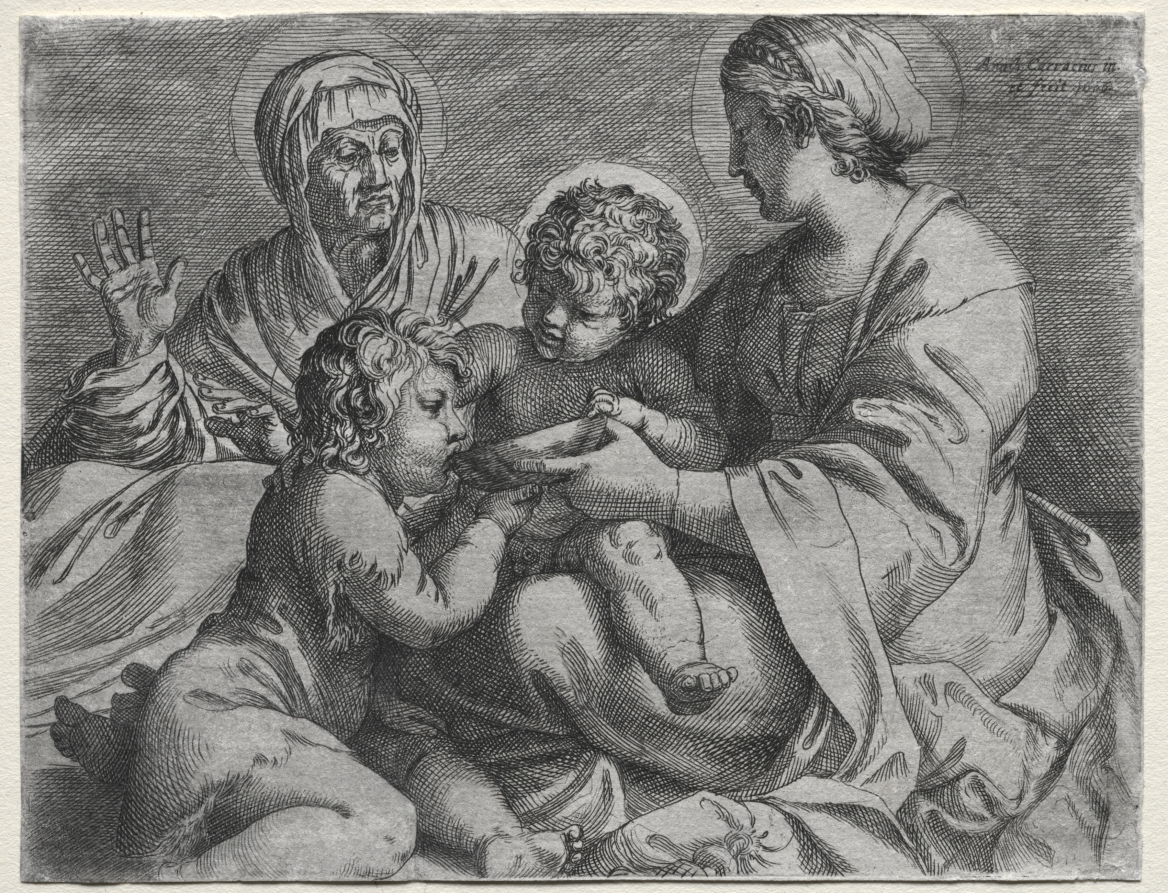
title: Madonna with the Bowl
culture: Italy, early 17th Century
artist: Annibale Carracci (Italian, c. 1560–1609)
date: 1606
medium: etching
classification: Print